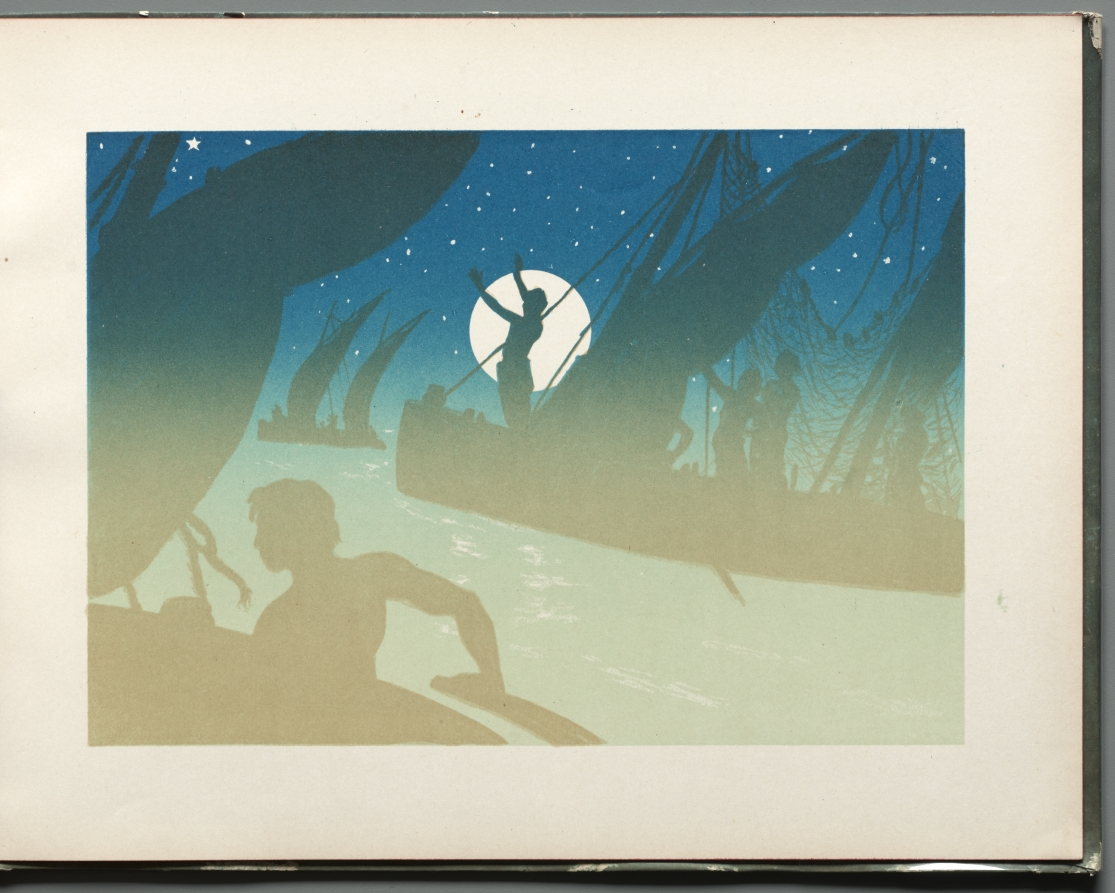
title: The Progress of the Stars: Les Pêcheurs (Suite)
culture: France, 19th century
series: Bound Volume illustrating the poetry and music of Georges Fragerolle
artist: Henri Rivière (French, 1864–1951)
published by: C. Marpon & Flammarion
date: 1890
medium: 18 color lithographs in a Bound Volume illustrating the poetry and music of Georges Fragerolle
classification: Bound Volume